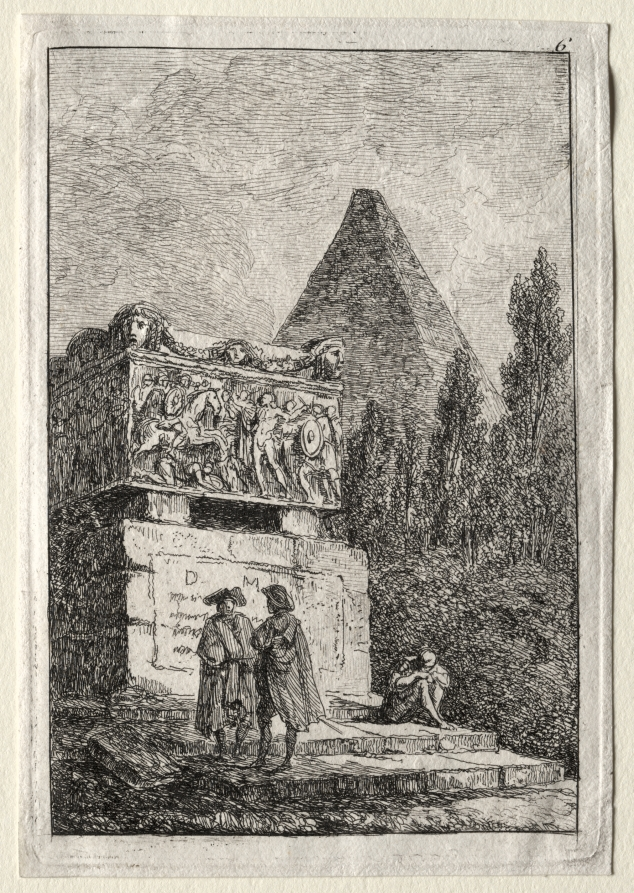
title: Le Sarcophage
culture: France, 18th century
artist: Hubert Robert (French, 1733–1808)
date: 1763–64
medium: etching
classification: Print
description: Derived from his own pen-and-ink drawings, this suite of etchings features fictional characters situated near recognizable buildings and statues in Rome. On the title page, Robert dedicated the suite to Marguerite Le Compte, who visited Rome in 1764 in the company of the wealthy author and art enthusiast Claude Henri Watelet. Both Le Compte and Watelet were amateur etchers, and they socialized with a group that included artists and printmakers centered at the academies in Italy. Robert’s dedication was likely motivated by the hope of future patronage from Le Compte. She may be the generous woman with a hand muff depicted in The Ancient Temple, the fifth scene in this series.